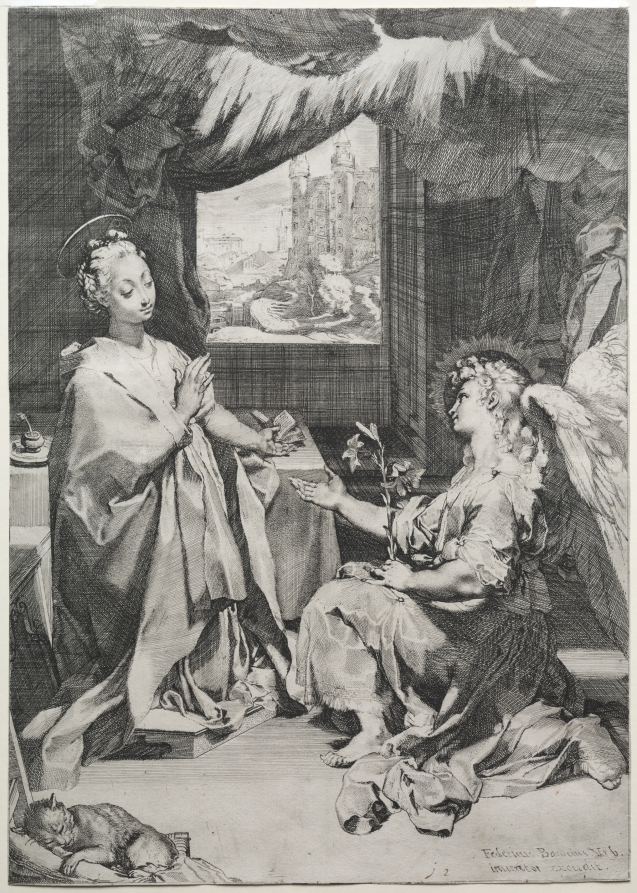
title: The Annunciation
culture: Italy, 16th century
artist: Federico Barocci (Italian, 1528–1612)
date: c. 1585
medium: etching and engraving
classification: Print